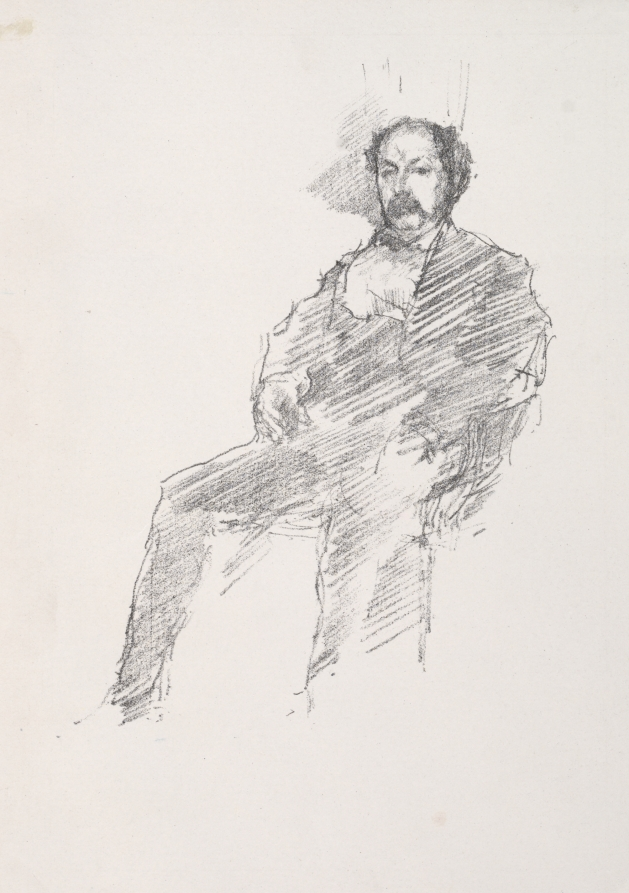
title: The Doctor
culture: America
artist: James McNeill Whistler (American, 1834–1903)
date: 1895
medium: lithograph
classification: Print